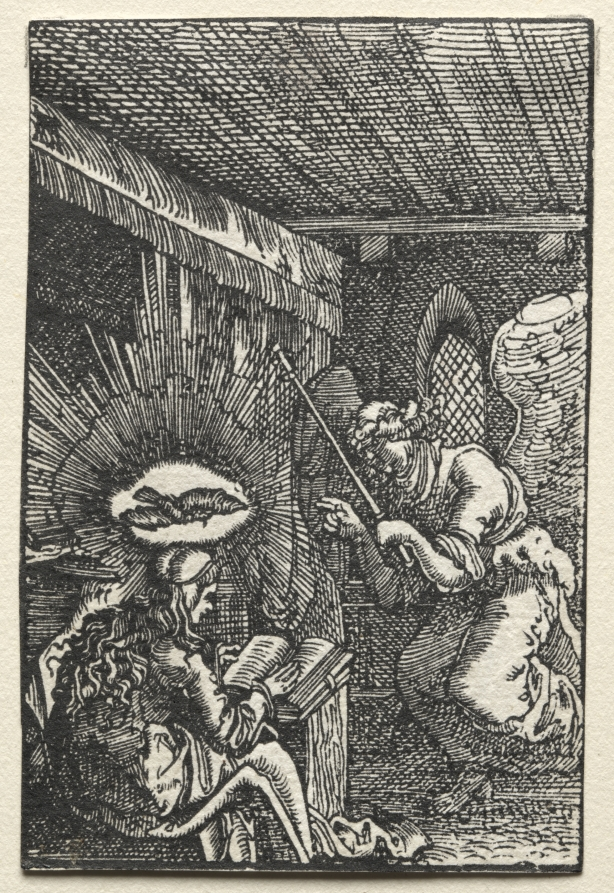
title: The Fall and Redemption of Man: The Annunciation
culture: Germany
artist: Albrecht Altdorfer (German, c. 1480–1538)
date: c. 1515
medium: woodcut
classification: Print